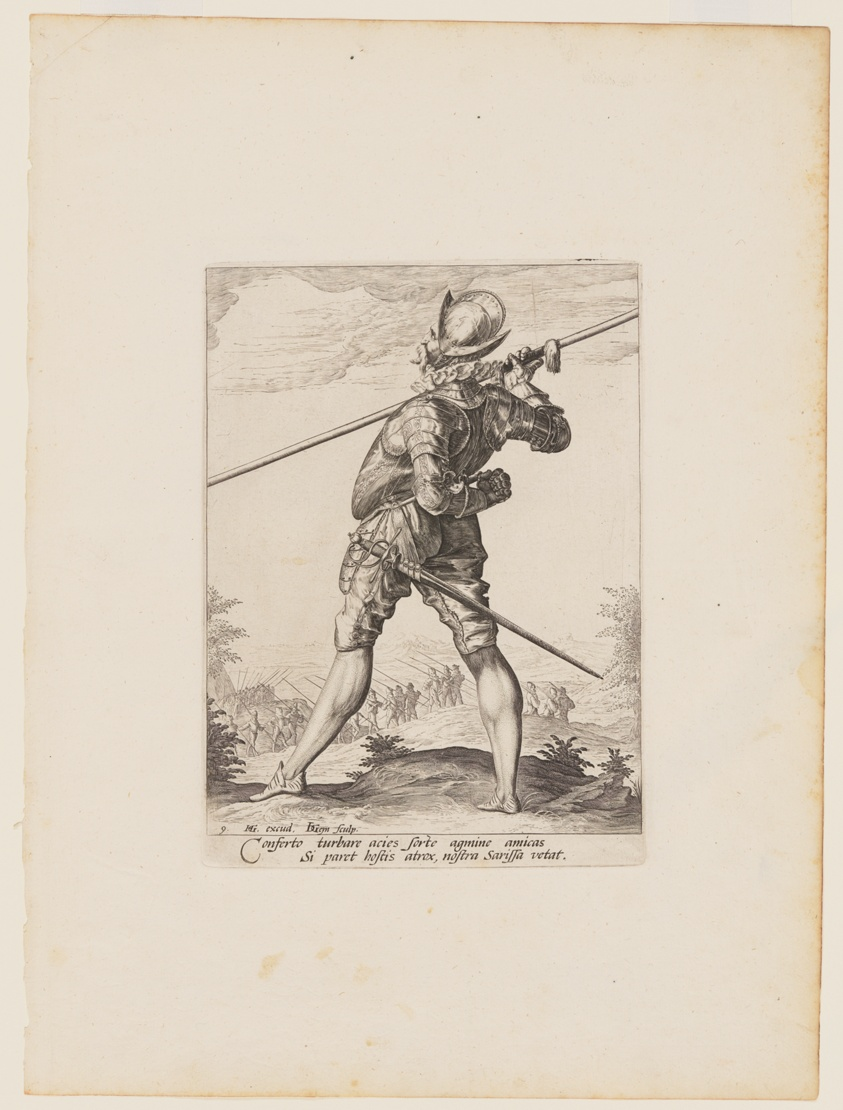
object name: Print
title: Pikeman, from Officers and Soldiers of the Bodyguard of Emperor Rudolph II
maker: Jacques de Gheyn II (Dutch, 1565–1629); after Hendrick Goltzius (Dutch, 1558–1617)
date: 1587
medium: Engraving on ivory laid paper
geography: Netherlands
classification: engraving; paper; print; prints and drawing